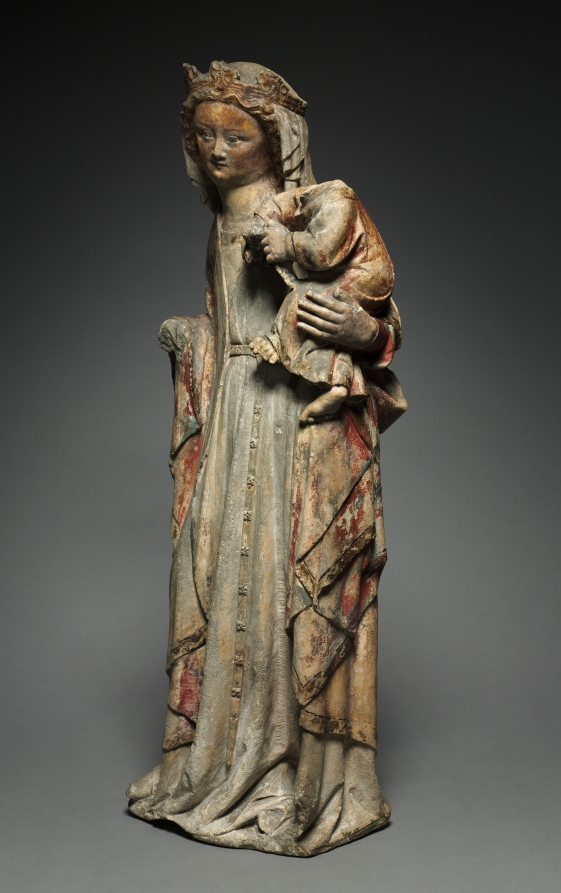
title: Virgin and Child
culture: France, Lorraine, 14th century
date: c. 1315–20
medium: limestone with traces of polychromy and gilding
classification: Sculpture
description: This graceful Virgin and child is a beautiful example from a large number of such figures produced in Lorraine, in eastern France, during the early 1300s. Lorraine at the time had a well-established artistic tradition and was under the rule of the Counts of Bar with established cultural links to both Flanders and England. Many of the surviving Lorraine Virgins share common characteristics consistent with this example--the swaying posture, with the weight of the Virgin placed on the left foot; and an open mantle with an exposed belted gown, the girdle itself trailing to the ground and ornamented with rosettes. Such standing figures were likely made for use in parish churches, cathedrals, aristocratic oratories, and monastic chapels, and attest to the intense veneration rendered to the Virgin during the period.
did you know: The CMA has a rare example of a similar woman’s belt (1930.742).